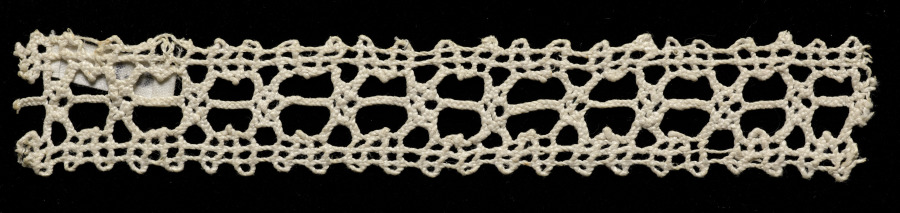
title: Lace Insertion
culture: Italy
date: 1600s–1700s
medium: Bobbin lace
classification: Lace